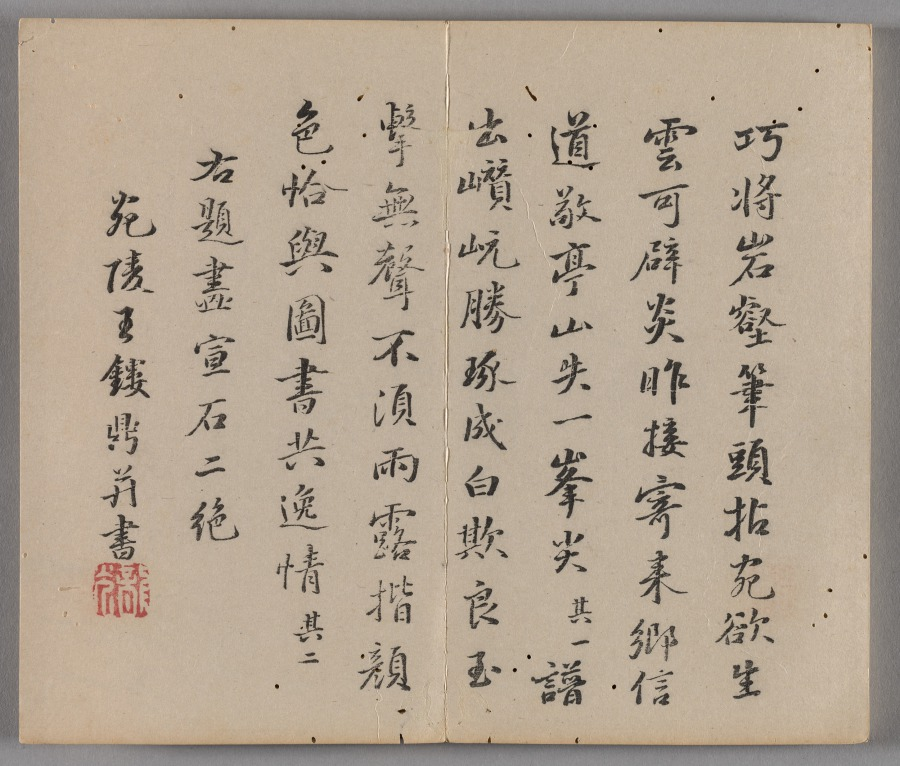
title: Ten Bamboo Studio Painting and Calligraphy Handbook (Shizhuzhai shuhua pu): Rocks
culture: China, Qing dynasty (1644-1911)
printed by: Hu Zhengyan (Chinese, c. 1584–1674)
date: 1633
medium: Woodblock-printed book; ink and colors on paper; first edition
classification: Print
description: Color printing reached a level of perfection in the early 1600s, as seen in this Ten Bamboo Studio Collection of Calligraphy and Painting and the Mustard Seed Garden Manual of Painting (printed 1679 and 1701). The painterly quality, precision in registering (aligning) the woodblocks, and harmonious colors made them the most successful color print editions in Chinese history. Both editions were printed and compiled in Nanjing, spread nationwide, and had a great impact on the arts in Japan and Korea.